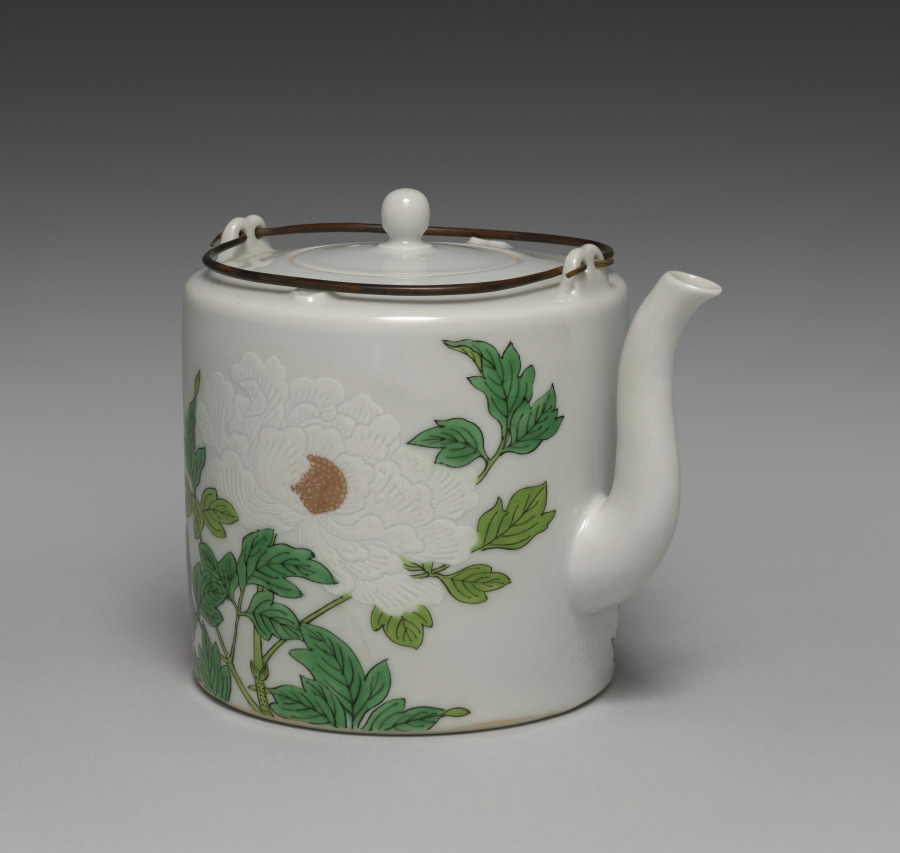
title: Sake Pourer with Flowers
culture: Japan, Meiji period (1868–1912)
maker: Seifū Yohei III (Japanese, 1851–1914)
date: 1893–1914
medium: Porcelain with molded design, overglaze color enamel, and metal handles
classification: Ceramic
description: This sake pourer is of a type called a chōshi. It is elaborately decorated with flowers in overglaze enamels in several colors, including black for the contour lines of leaves and stems; orange, white, gold, and two shades of green for the peonies; and purple for the thistles. The white blossoms have been built up with white enamel, then incised for a white-on-white eect; the orange and purple use an absence of color to produce the contours of individual petals. Yohei III referred to his works in multicolor overglaze enamels as “hundred flower brocades” (hyakka nishiki). Two small nyoi (C. ruyi) staff-head motifs, molded in clay and applied to either side of the lid, create handle rests, as well as natural places for the thumb and index finger of one hand to rest, so one can both secure the lid and steady the pour, while the handles are held in the other hand. The top of a nyoi staff resembles the curled cap of the reishi. Such scepters are imagined to be found in the hands of sages, Daoist immortals, or Buddhist deities and connote lofty goings-on and favorable circumstances. Since this sake pourer is unsigned, it may have been made for imperial family members to give as a gift.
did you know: This sake pourer with purple thistles and orange peonies shows off Seifū Yohei III’s technique of enamels painted over the glaze.